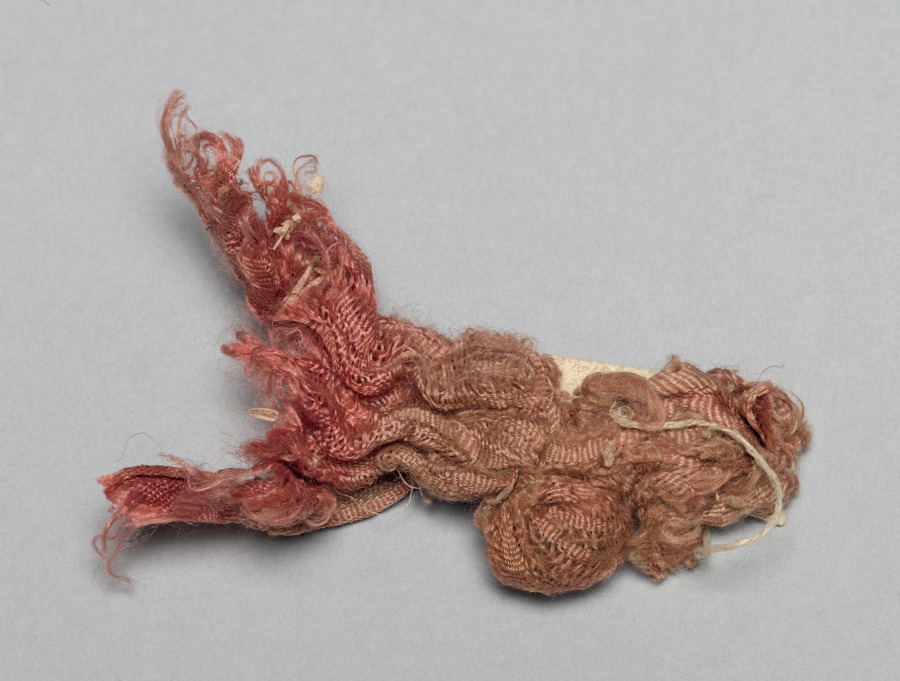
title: Relic of St. Gertrude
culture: Germany, Lower Saxony?, Romanesque period, 11th century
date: c. 1045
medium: Plain weave variant rose colored silk with an extant selvage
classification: Metalwork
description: This relic is housed in the portable altar commissioned by Countess Gertrude of Brunswick, one of the Guelph Treasure’s earliest and most sumptuous objects.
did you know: An X-ray revealed no solid material is wrapped in this piece of cloth.